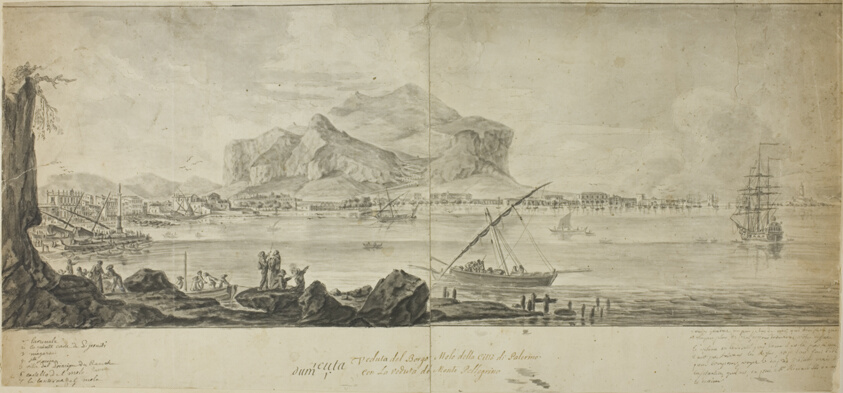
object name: Drawing and Watercolor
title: View of the City and Harbor of Palermo with a View of Monte Pellegrino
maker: Adrien Manglard (French, 1695-1760)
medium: Pen and black ink with brush and gray wash, on ivory laid paper, tipped onto tan wove paper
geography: France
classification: ink or chalk wash; drawings (visual works); prints and drawing